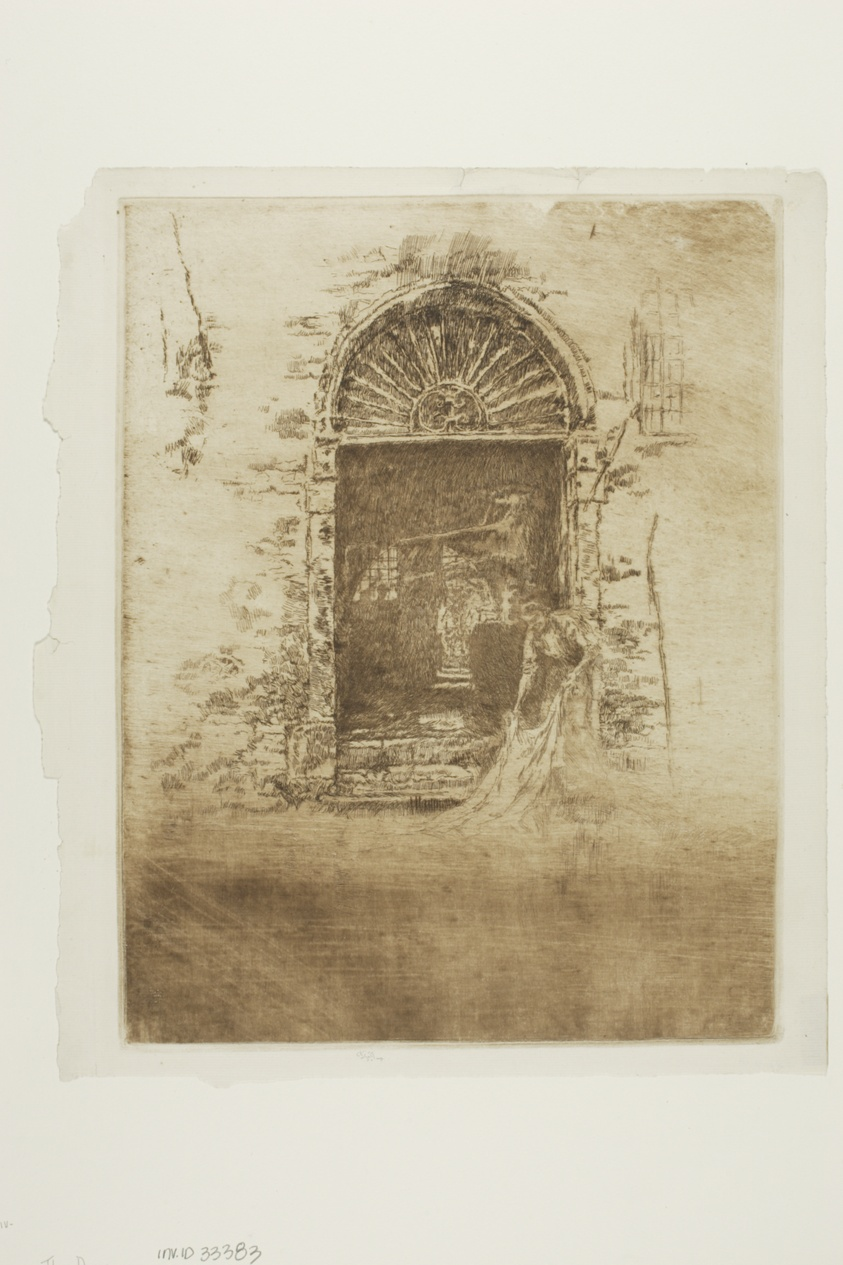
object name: Print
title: The Dyer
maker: James McNeill Whistler (American, 1834-1903)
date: 1879/80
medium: Etching and drypoint in brown ink on off-white laid paper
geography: United States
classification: etching; drypoint; print; prints and drawing; paper